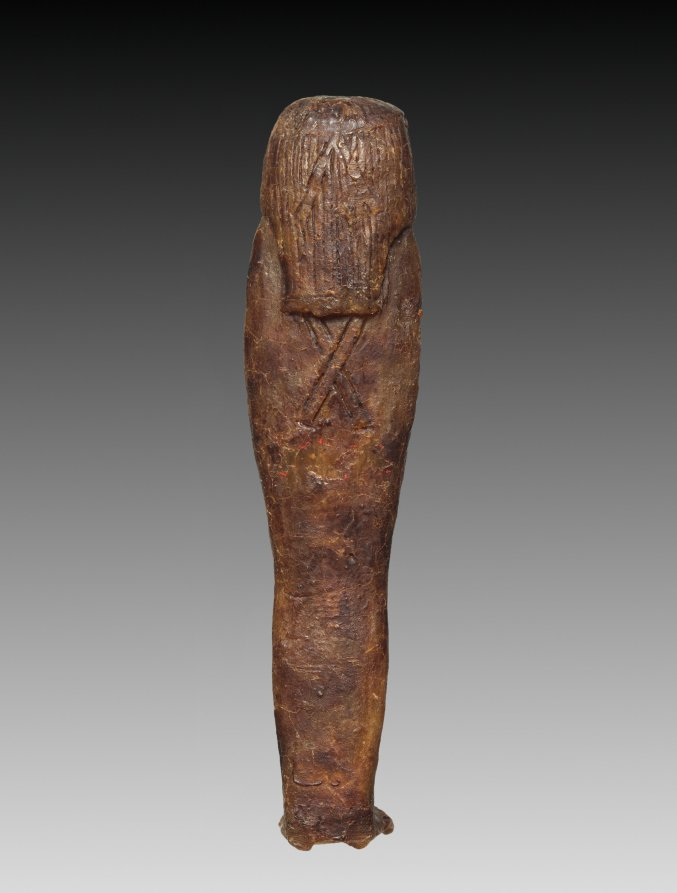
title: Son of Horus: Imsety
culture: Egypt, Third Intermediate (1069–715 BCE), Dynasties 21–22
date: 1000–900 BCE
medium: wax with dark amber varnish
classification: Funerary Equipment